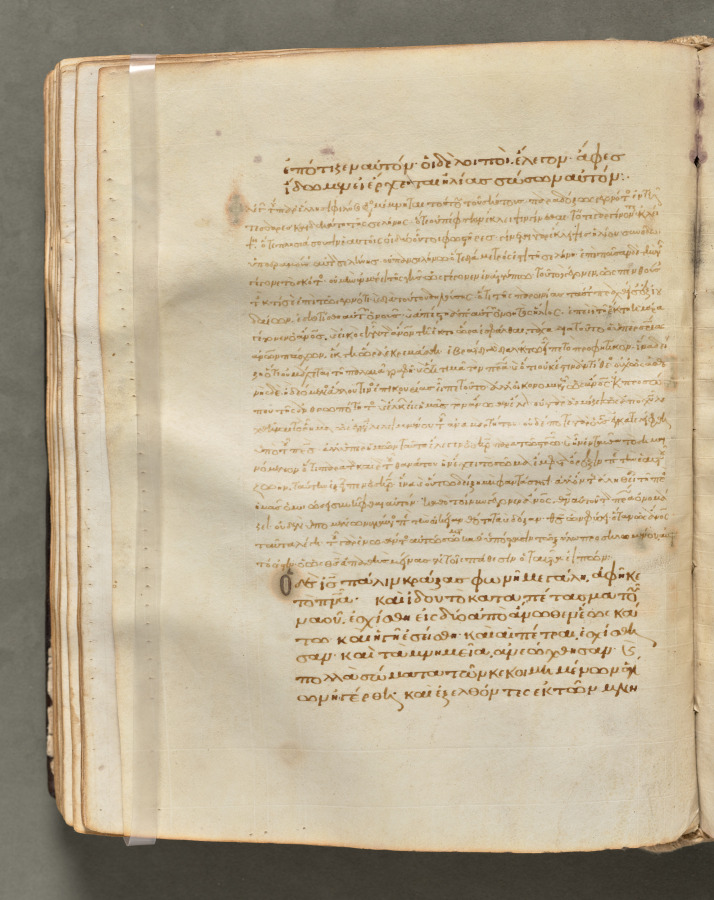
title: Text, folio 126 (verso), from a Gospel Book with Commentaries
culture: Byzantium, Constantinople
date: c. 1000–1100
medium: ink, tempera, and gold on vellum; leather binding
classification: Bound Volume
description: Each of the four gospels in this book opens on a page with brilliantly illuminated borders depicting the author of the text as well as birds-principally peacocks, symbols of the immortality of the soul-and fountains, representing the fountain of life and the salvation of the soul. This volume consists of 428 leaves with texts in Greek. Its level of sophistication suggests that it was probably written and decorated in a monastery in Constantinople.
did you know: Gospel Books were carried in procession through Byzantine churches.